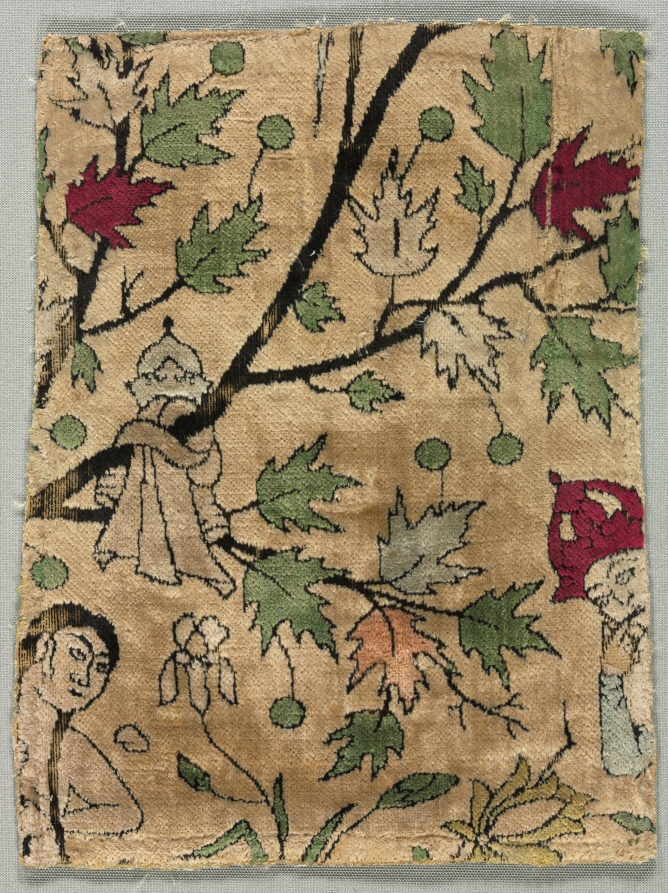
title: Velvet Fragment, Khusrau Sees Shirin Bathing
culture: Iran, Kashan, Safavid period (1501-1722)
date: 1550–99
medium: silk; velvet, cut, pile-warp substitution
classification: Velvet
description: These velvet fragments depict an episode from the Khamsa (Quintet) of Nizami (1141–1209), in which the lovers Khusrau and Shirin first see each other. A pre-Islamic king of Iran, Khusrau has fallen in love with Shirin after seeing her portrait and is traveling to meet her when he happens across her bathing in a stream. Not yet realizing that she is Shirin, Khusrau is transfixed by the woman’s beauty and covets both her and her magnificent black horse. The horse’s mane is just visible here, and she has placed her crown and tunic atop a branch.